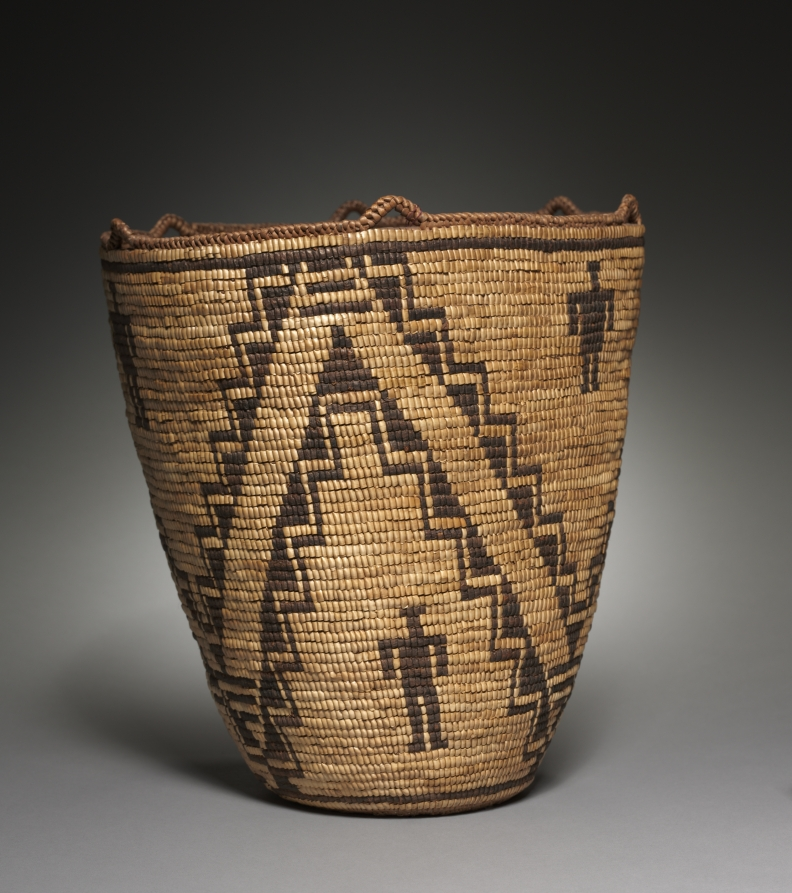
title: Burden Basket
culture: Native North American, Pacific Northwest, Plateau, Klickitat people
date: c.1900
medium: horsetail fragments on cedar rool; coiled, imbricated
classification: Basketry